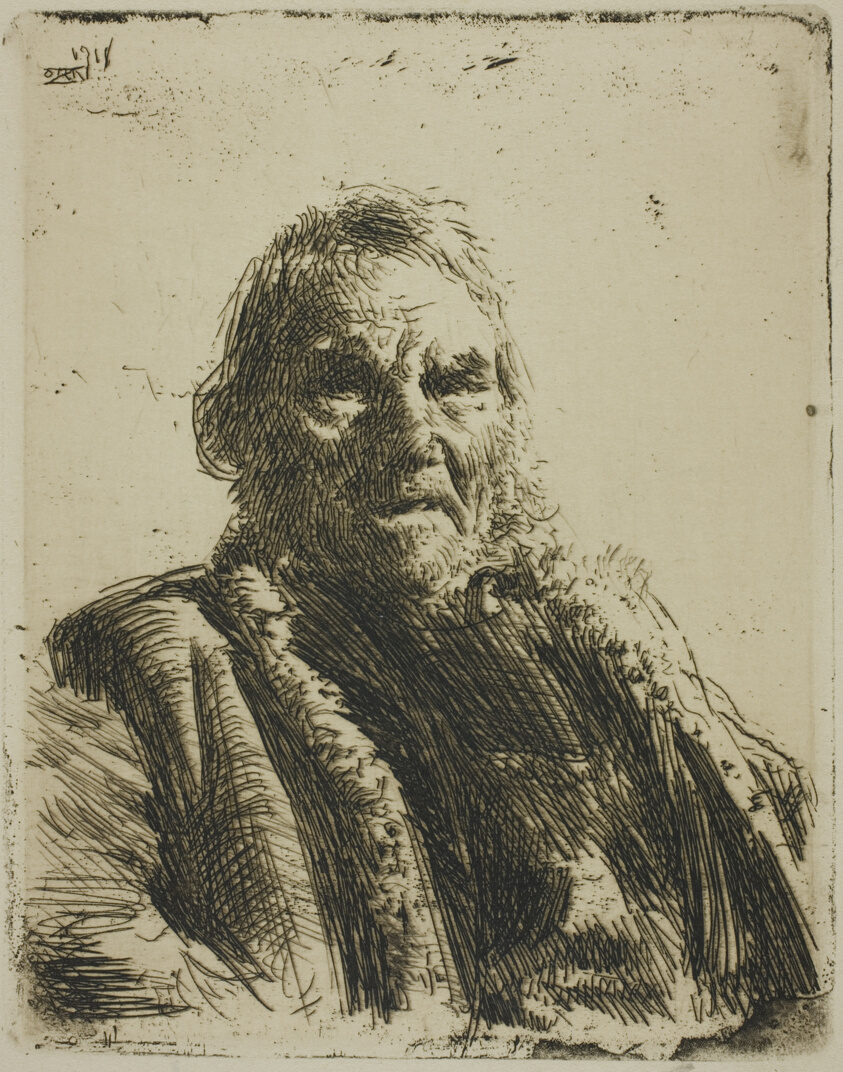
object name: Print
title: Old Soldier ("Prinsen")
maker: Anders Zorn (Swedish, 1860-1920)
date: 1911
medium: Etching on ivory laid paper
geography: Sweden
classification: etching; print; prints and drawing